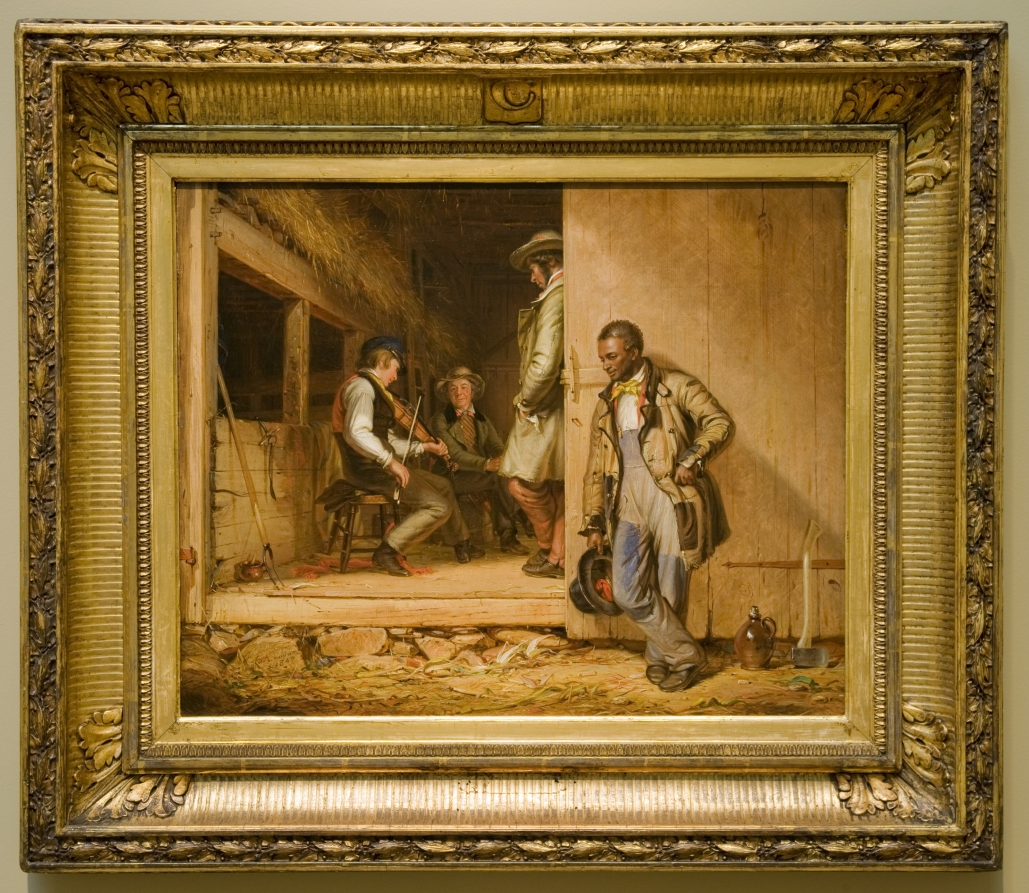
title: The Power of Music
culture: America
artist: William Sidney Mount (American, 1807–1868)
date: 1847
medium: oil on canvas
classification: Painting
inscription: signed lower left: Wm S. MOUNT. / 1847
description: Set in rural Long Island before the Civil War, Mount's complex painting presents an African American laborer listening intently to a fiddle tune enjoyed by white men. While a love of music unites the figures in a bond of shared humanity, the two races occupy different spaces--one inside, one outside, both separated by a barn door--effectively symbolizing the pronounced divisions in America at the time.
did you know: Mount was an accomplished fiddle player and even patented a new design for the instrument.